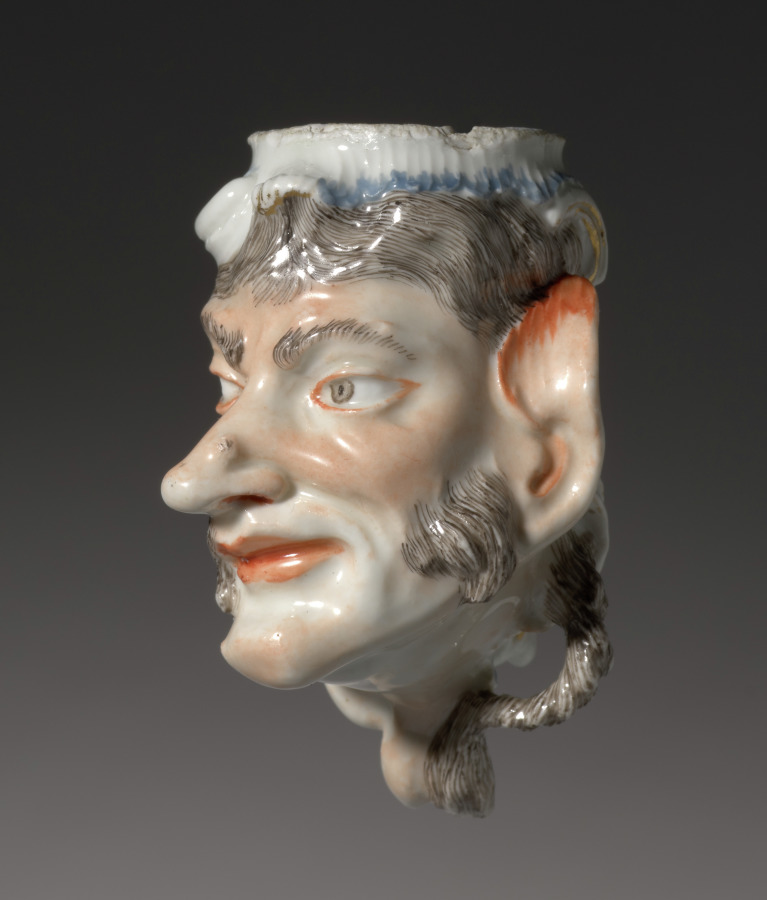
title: Pipe Head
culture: Germany, Nymphenburg, 18th century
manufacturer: Nymphenburg Porcelain Factory (German, founded 1747)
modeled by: Franz Anton Bustelli (Swiss, 1723–1763)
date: mid-1700s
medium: porcelain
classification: Ceramic